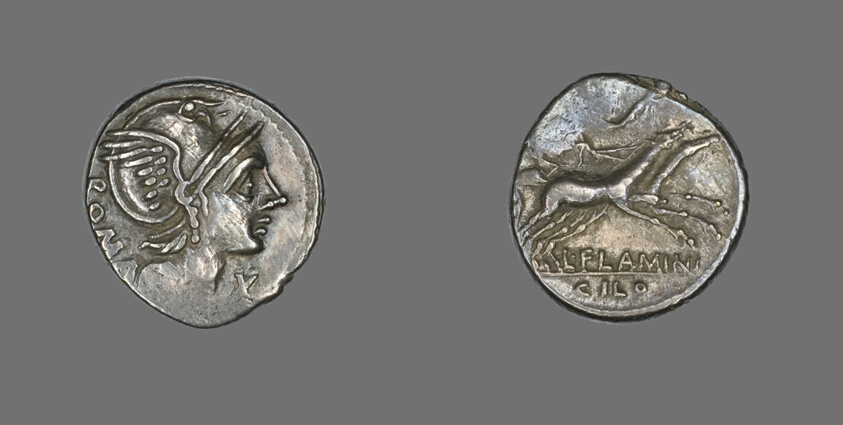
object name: Coin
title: Denarius (Coin) Depicting the Goddess Roma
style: roman (ancient, style or period), ancient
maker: Roman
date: 109-108 BCE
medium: Silver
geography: Roman Empire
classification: coin; ancient art